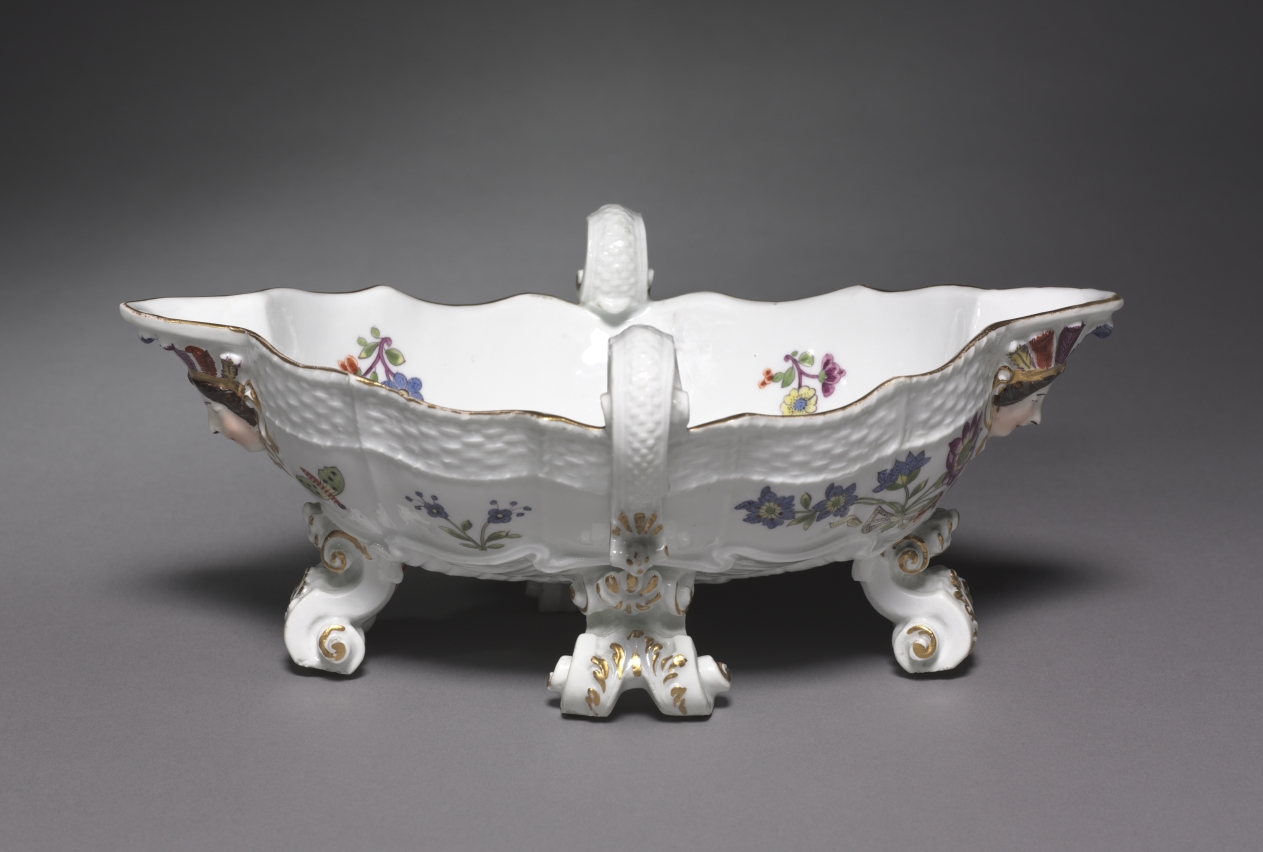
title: Sauceboat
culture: Germany, Meissen, Johann Joachim Kandler period 1735-56, 18th Century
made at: Meissen Porcelain Factory (German, est. c. 1710)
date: 1735–56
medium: porcelain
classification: Ceramic